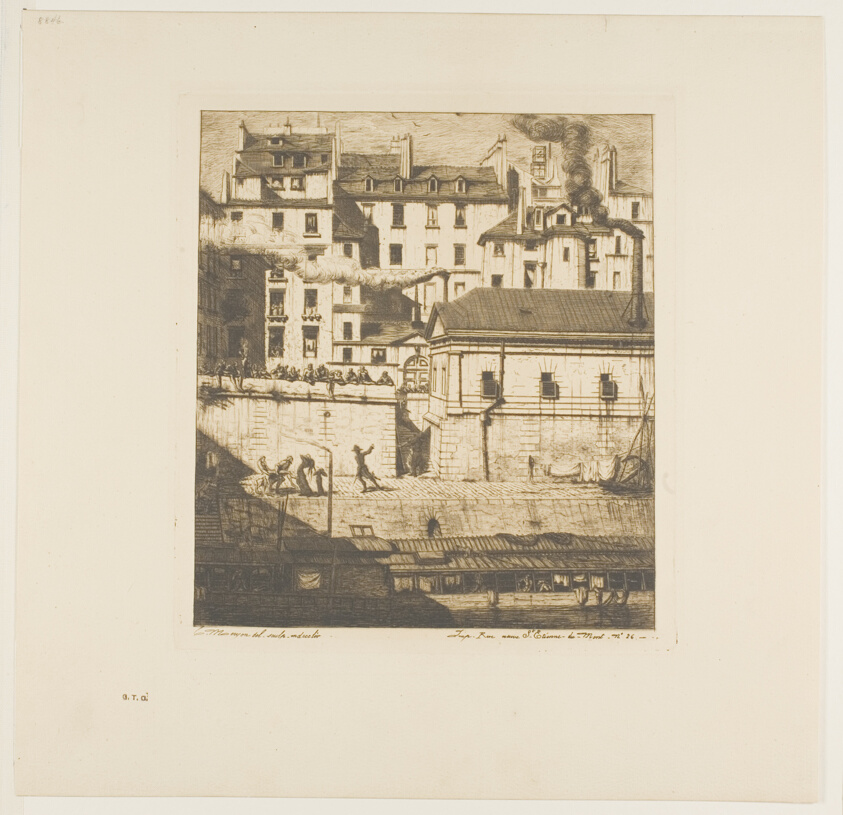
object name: Print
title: The Mortuary, Paris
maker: Charles Meryon (French, 1821-1868)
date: 1854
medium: Etching and drypoint in warm black on cream wove paper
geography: France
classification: etching; print; prints and drawing